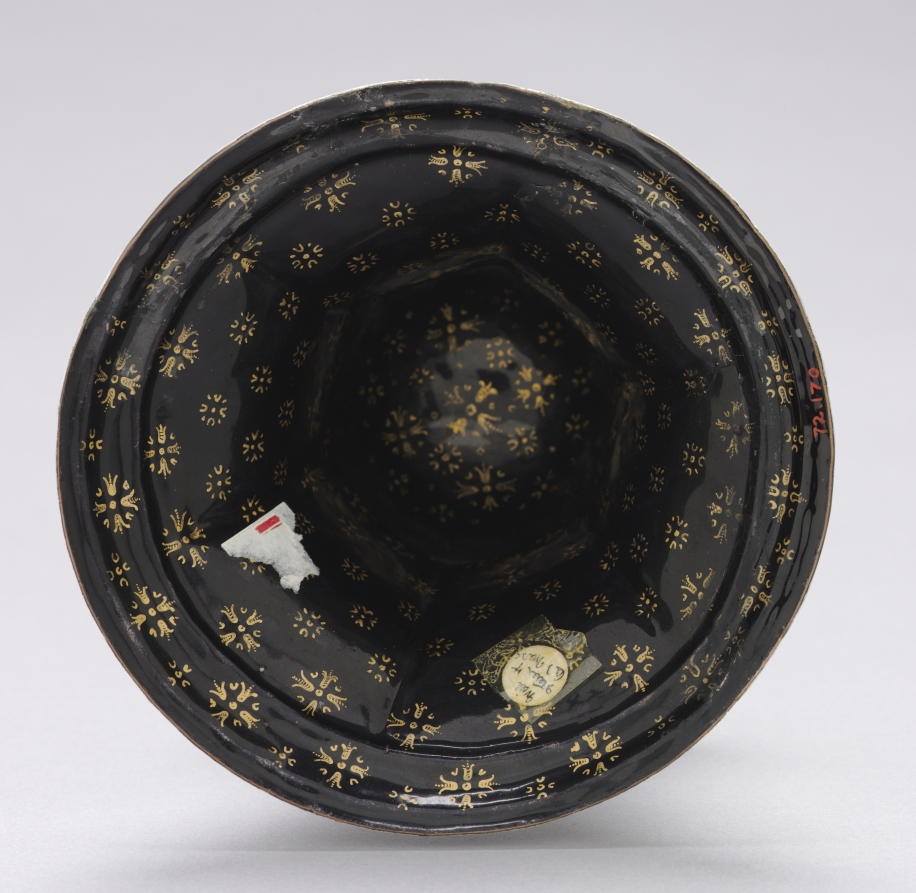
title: Salt Dish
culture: France, Limoges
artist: Jean Limousin (French, 1528–c. 1610)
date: early 1600s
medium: painted enamel on copper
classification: Ceramic